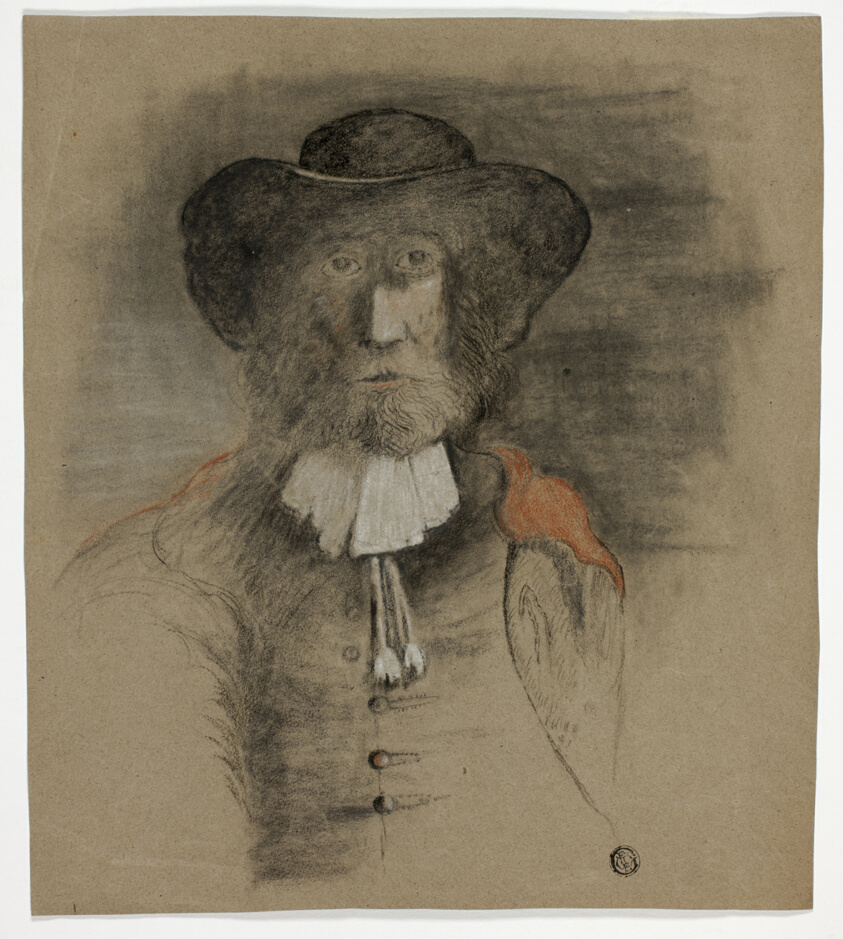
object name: Drawing and Watercolor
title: Clergyman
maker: After Agostino Carracci (Italian, 1557-1602); or possibly after Captain William Baillie (Irish, 1723-1810)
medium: Charcoal, with stumping and red chalk, heightened with white chalk, on tan wove paper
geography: Italy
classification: charcoal; drawings (visual works); prints and drawing